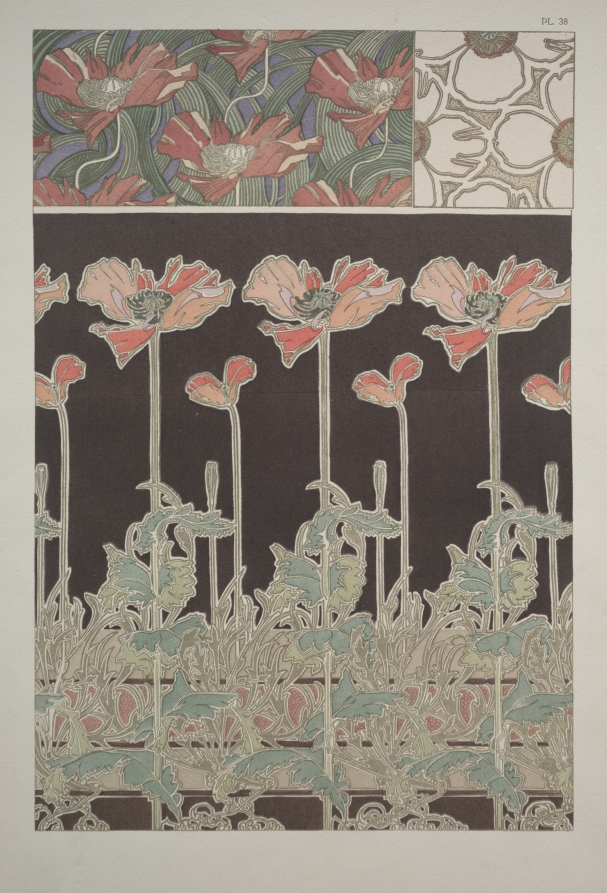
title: Documents Decoratifs: Plate 38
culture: Czechoslovakia, late 19th-early 20th century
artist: Alphonse Mucha (Czech, 1860–1939)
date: 1901–2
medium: lithograph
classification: Print